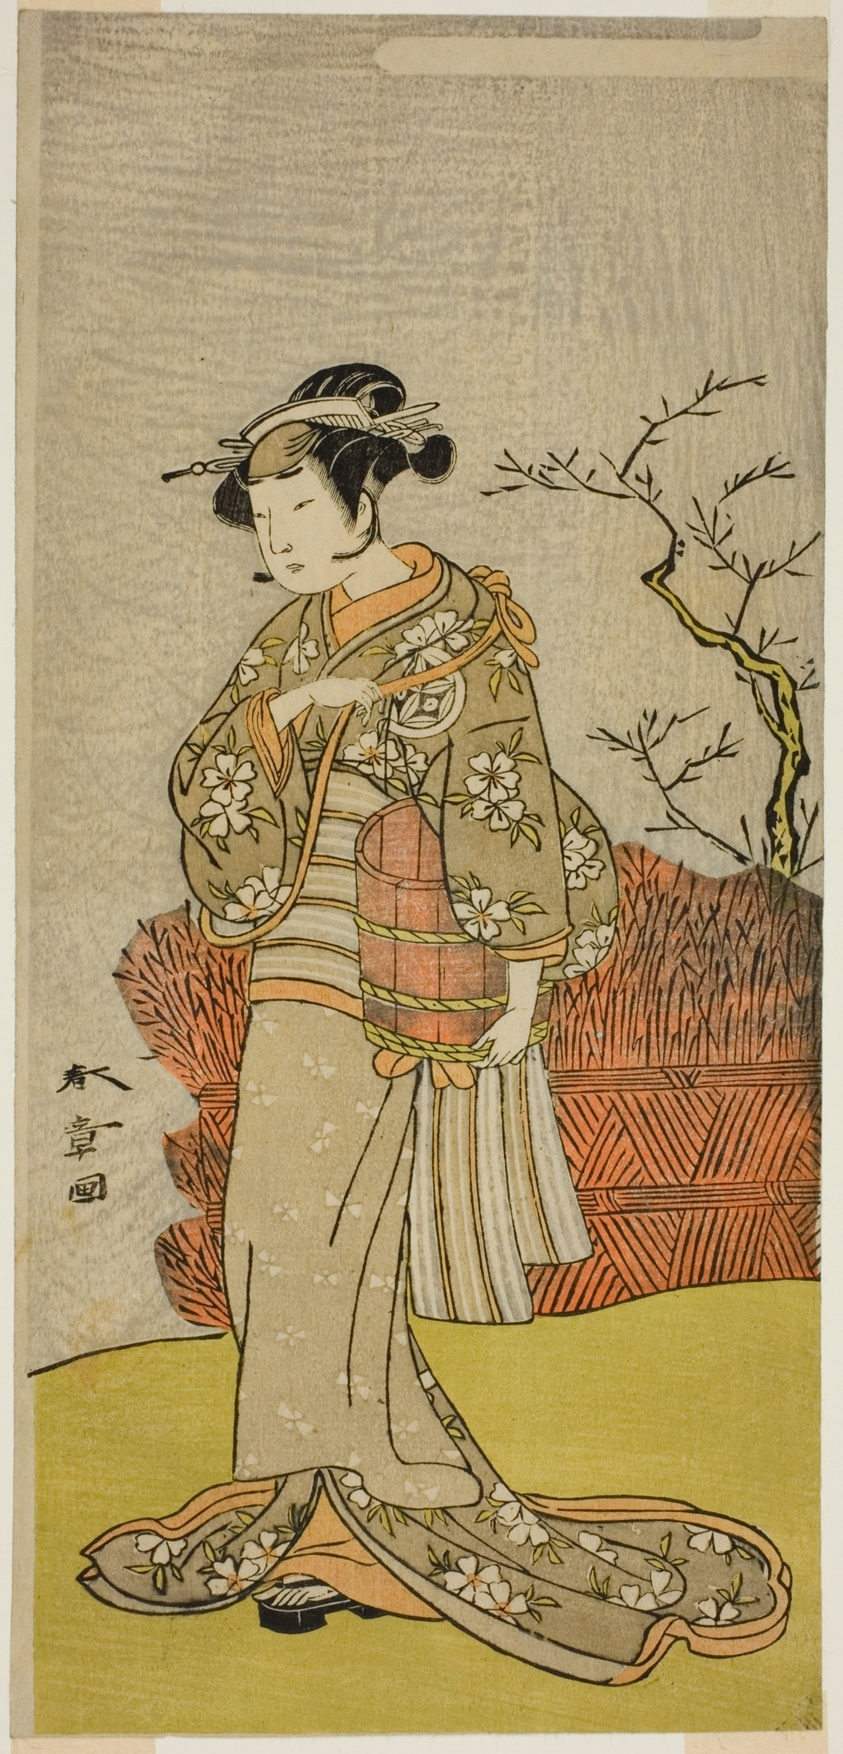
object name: Print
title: The Actor Yamashita Kinsaku II as Osaku (?) in the Play Onna Aruji Hatsuyuki no Sekai, Performed at the Morita Theater in the Eleventh Month, 1773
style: Japanese (culture or style)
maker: Katsukawa Shunsho 勝川 春章; Japanese, 1726-1792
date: c. 1773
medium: Color woodblock print; hosoban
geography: Japan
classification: woodblock print; print; asian art